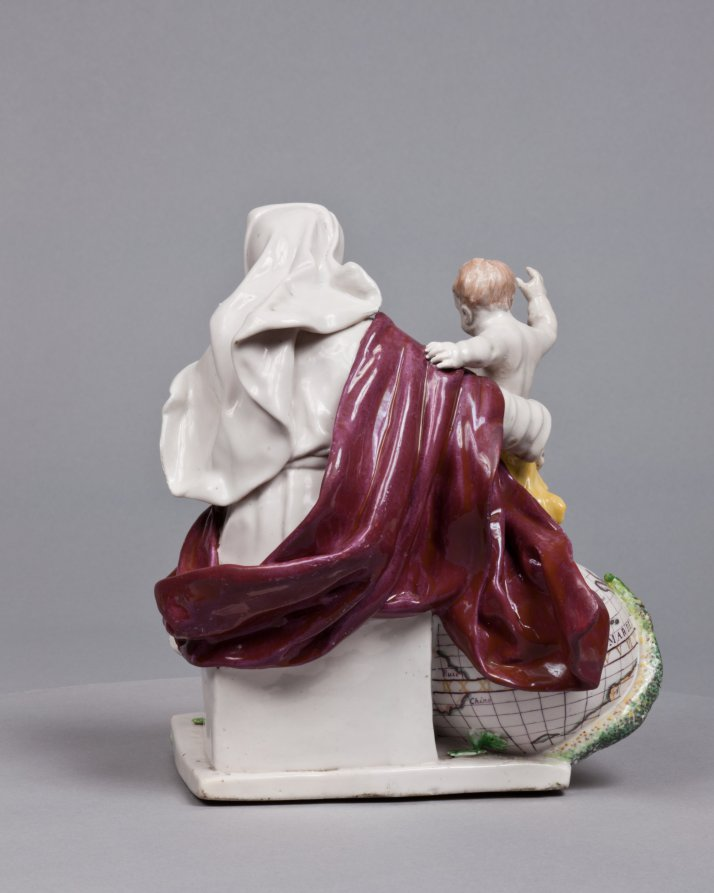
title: Madonna and Child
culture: England, Chelsea, 18th century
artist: Chelsea Porcelain Factory (Britain, London, 1745–84)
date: c. 1755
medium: porcelain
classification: Ceramic